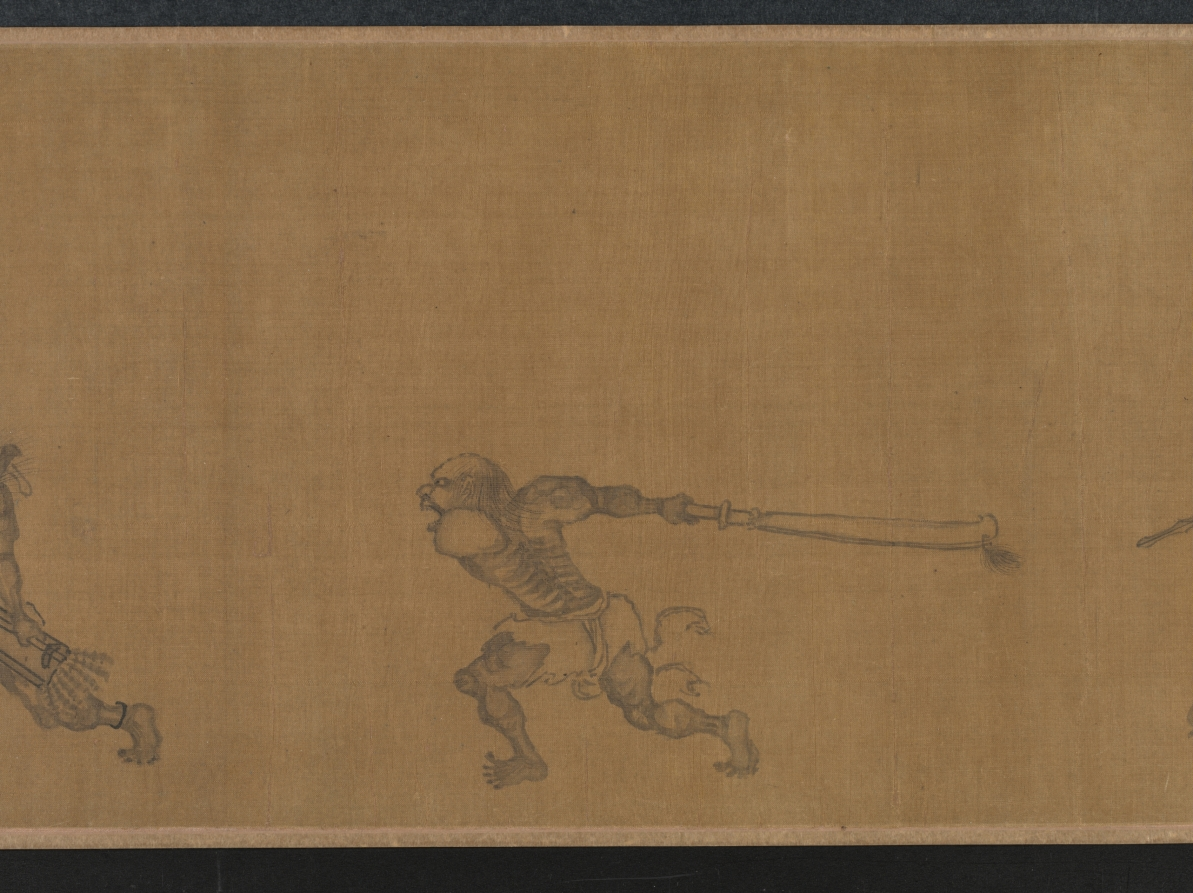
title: The Lantern Night Excursion of Zhong Kui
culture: China, Yuan dynasty (1271-1368)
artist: Yan Hui (Chinese, active 1270–1310)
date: late 1200s–early 1300s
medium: handscroll; ink and slight color on silk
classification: Painting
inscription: Artist's signature [and probable seal]: Yan Qiuyue 顏秋月 Title on frontispiece and 1 seal of Niu Shuyu 鈕樹玉 (1760–1827): Qiuyue mohuan 秋月墨幻 [Qiuyue's Ink Fantasy]. 31 additional seals: 2 of Yang Shiqi 楊士奇 (1365–1444); 2 of An Guo 安國 (1481–1534); 8 of Xiang Yuanbian 項元汴 (1525–1590); 2 of Geng Zhaozhong 耿昭忠 (1640–1686); 4 of Pu Tung 溥侗 (1870–1952); 7 of Tan Jing 譚敬 (1911–1991); 1 of Liu Ting-chih (20th c.); 5 unidentified.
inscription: An inscription by Zizhi Shanren 紫芝山人 [probably Jiang Hui 蔣惠], dated 1389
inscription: An inscription by Wu Kuan 吳寬 (1436–1504)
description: Here, the demon queller Zhong Kui leads a nightly procession of street entertainers with bare, muscular bodies and demonic faces. Some wear shabby clothes, and all perform stunts and tricks to astound and scare the viewer. In fact, a New Year custom in cities of southeast China had the poor, disguised as demons, process through the streets and play their tricks to clear households of evil spirits and welcome the spring. From right to left, a demonic figure leads the procession and beats a drum; another lifts a large rock; one stands on his hands trying to drink; one balances a jar on his elbow; three hold and wield weapons; one carries a folded chair covered by a cow’s skin; another holds Zhong Kui’s qin (zither), books, brush, and inkstone. At the end of the scroll, two figures offer a cup and bottle of wine to Zhong Kui, who lifts his hand in command.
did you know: Zhong Kui was an ancient ghostbuster.